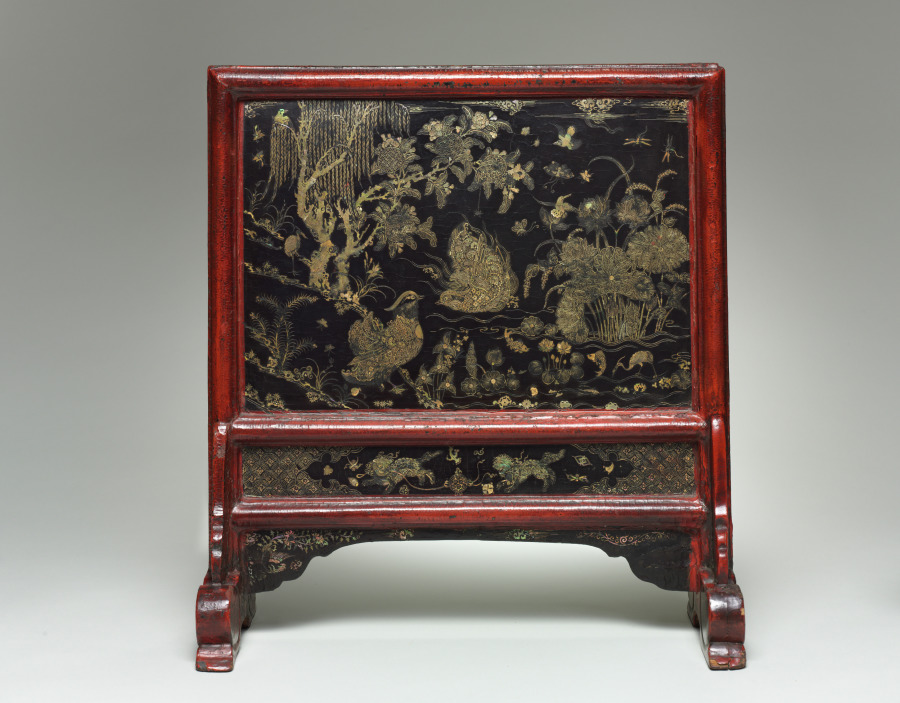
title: Table Screen: The Peach Blossom Spring, Land of the Immortals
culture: China, Yuan dynasty (1271-1368)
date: 1300s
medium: lacquer on wood with mother-of-pearl inlay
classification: Lacquer